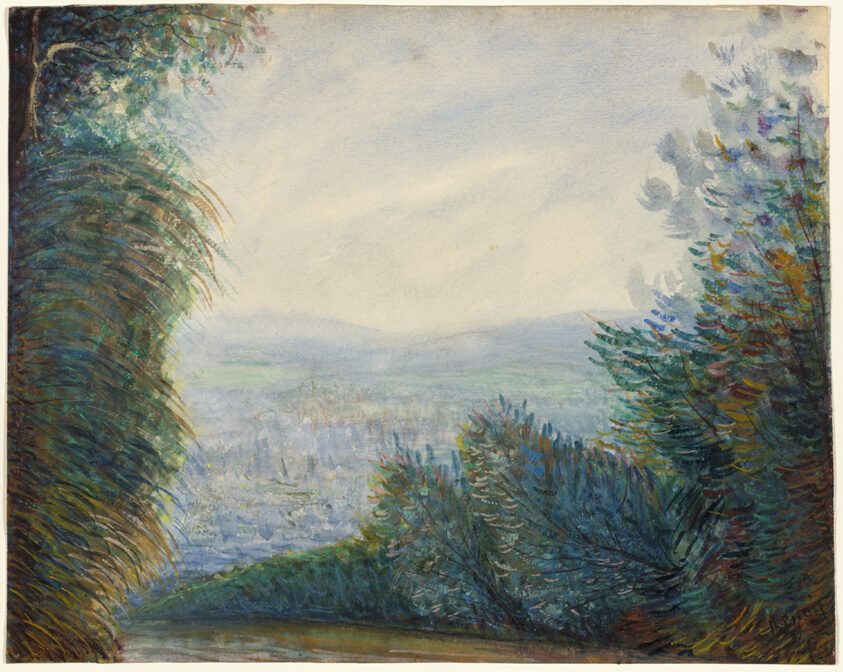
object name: Drawing and Watercolor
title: The Auvers Valley on the Oise River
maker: Attributed to Pierre Auguste Renoir (French, 1841–1919); or Hyacinthe Eugène Meunier (Eugène Murer; French, 1841–1906)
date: after 1884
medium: Gouache and watercolor, with touches of scraping, on ivory wove paper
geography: France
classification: prints and drawing; watercolor; gouache; drawings (visual works)